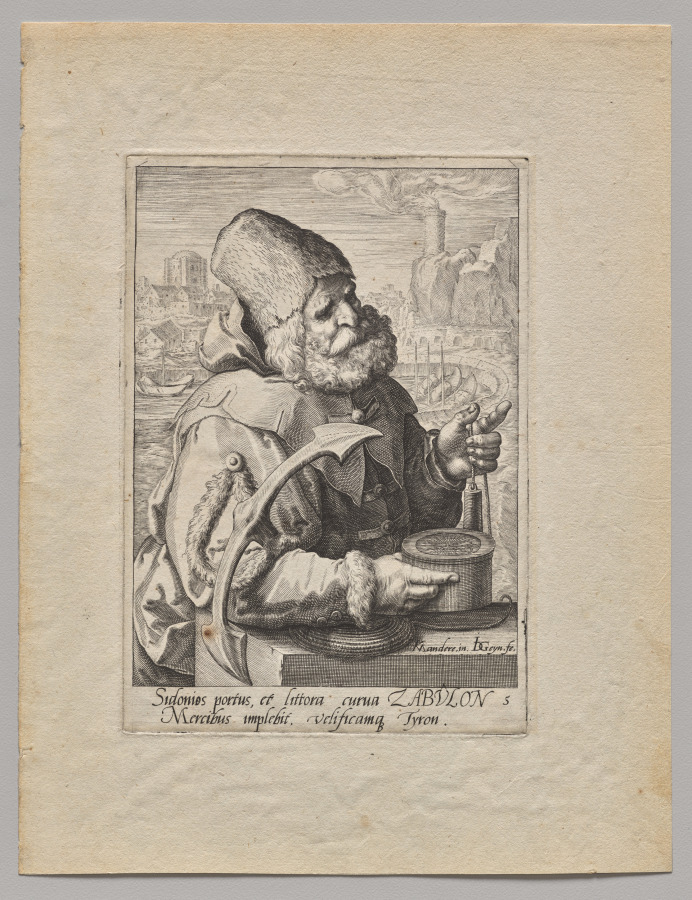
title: Plate 5: Zabulun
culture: Netherlands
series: The Twelve Sons of Jacob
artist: Jacob de Gheyn II (Netherlandish, 1565–1629)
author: after Karel I van Mander (Netherlandish, 1548–1606)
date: c. 1589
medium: engraving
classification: Print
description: n this print, the biblical figure Zabulun is shown holding an anchor and fishing line before a harbor, denoting his tribe’s domicile near the sea. This is one of a series of prints depicting the twelve sons of Jacob, each with an attribute and costume that denotes his character. According to the Old Testament, Jacob blessed each of his twelve sons, prophesizing the destiny of their tribe, and assigning them a parcel of land in Canaan. The print series was made in the Netherlands in the late 16th century, a time of political struggle when Old Testament heroes were popular exemplars of fortitude and patience.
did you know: References to seafaring including a fishing line, anchor, and navigational device, suggest that this Old Testament figure prospers from the merchant trades.